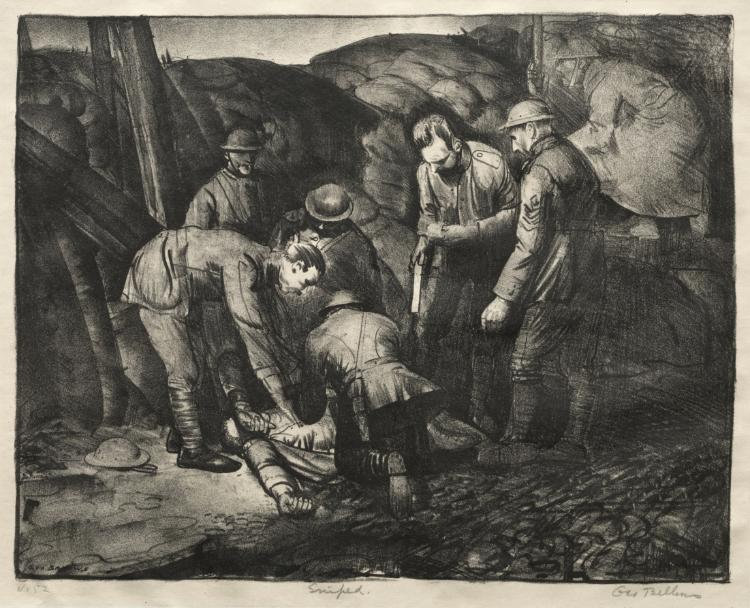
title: War Series: Sniped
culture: America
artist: George Bellows (American, 1882–1925)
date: 1918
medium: lithograph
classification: Print